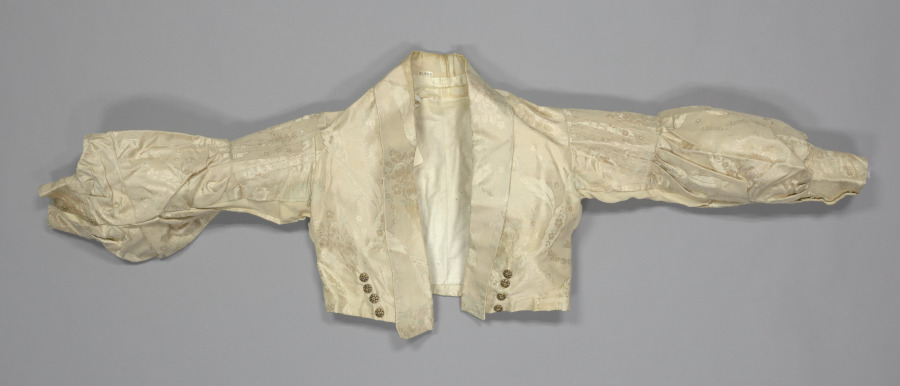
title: Woman's Costume (Jacket)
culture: Italy, Sicily, 19th century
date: 1800s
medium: silk (white) damask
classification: Garment